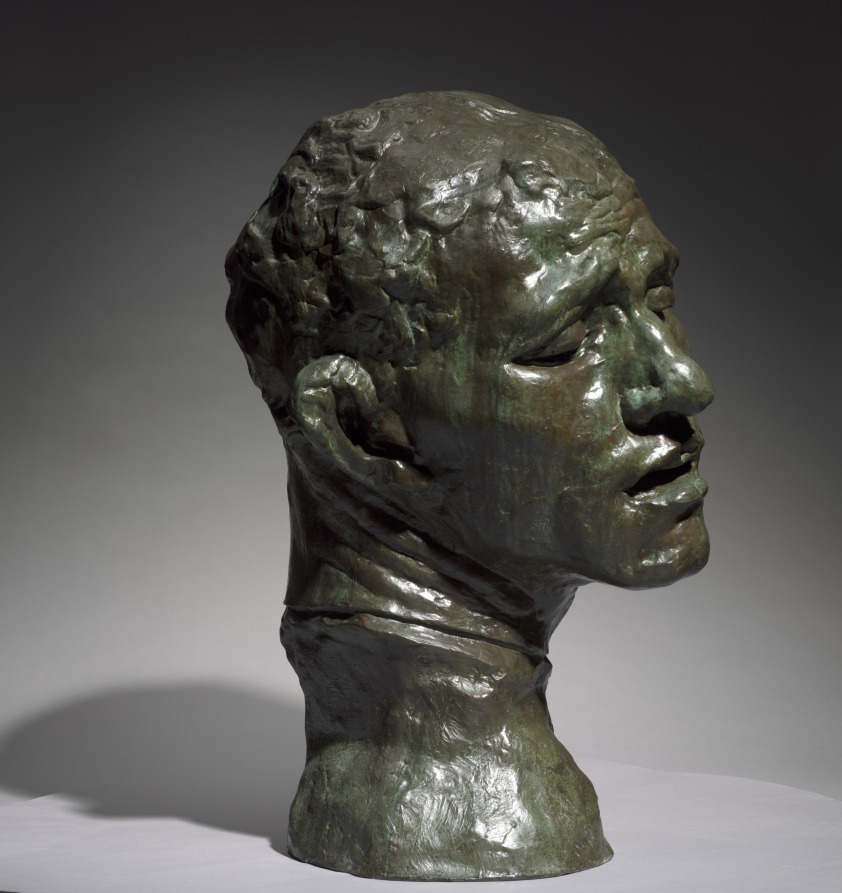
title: Heroic Head of Pierre de Wissant, One of the Burghers of Calais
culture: France, 19th century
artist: Auguste Rodin (French, 1840–1917)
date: 1886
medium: bronze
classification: Sculpture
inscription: inscribed at neck, left: A.Rodin; inscribed lower back: Alexis Rudier/Fondeur-Paris.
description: This sculpture depicts one of the figures in Rodin’s large public monument The Burghers of Calais (1884–89), featuring six French men who volunteered to be taken prisoner by the English in exchange for lifting the siege of Calais during the Hundred Years War (1337–1453). Pierre de Wissant’s anguished expression suggests extreme mental suffering as he contemplates his expected execution. Rodin exhibited a life-size version of the figure as an independent work before completing the monument. He later made multiple versions in various sizes and media.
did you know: This sculpture depicts the head of a figure from Rodin's large public monument The Burghers of Calais (1884-89). The CMA also owns a plaster version of the head.